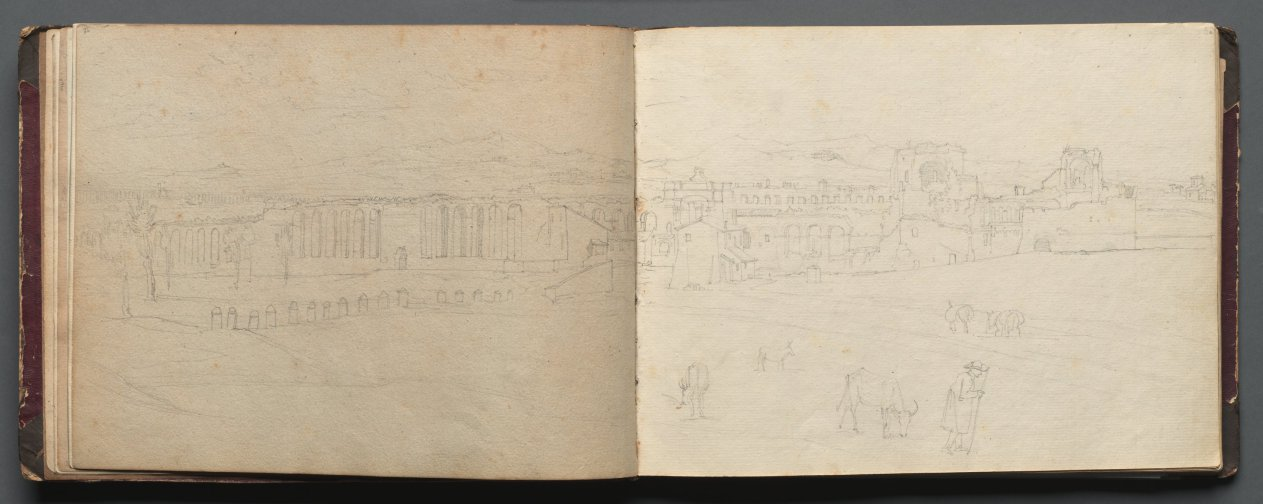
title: Album with Views of Rome and Surroundings, Landscape Studies, page 08b and 09 a: Panoramic view of Rome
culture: Germany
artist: Franz Johann Heinrich Nadorp (German, 1794–1876)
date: c. 1830s-70s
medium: graphite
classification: Bound Volume